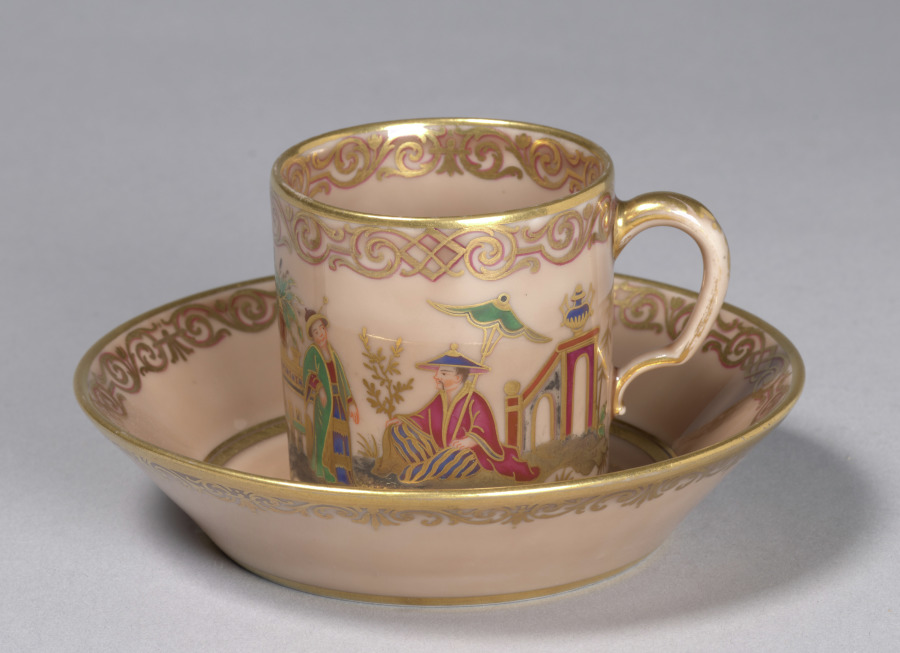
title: Cup and Saucer (Gobelet litron et soucoupe)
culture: France, Sèvres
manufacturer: Sèvres Porcelain Factory (French, est. 1756)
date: 1778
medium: hard-paste porcelain with overglaze enamel decoration and gilt and silver decoration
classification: Ceramic